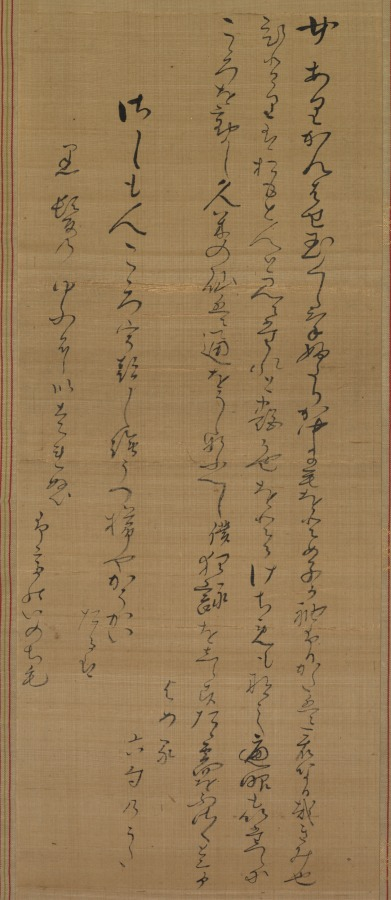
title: Two Beauties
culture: Japan, Edo period (1615–1868)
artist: Kitao Shigemasa (Japanese, 1739–1819)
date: late 1700s–early 1800s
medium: hanging scroll, pillar painting: ink and color on silk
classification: Painting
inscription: Artist's signature and seal, lower right corner. Poem inscribed on upper section of scroll.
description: Shigemasa favored using colors in broad opaque masses, as seen here in the beauties’ robes. He was a painter, printmaker, and poet, specializing in courtesan and actor prints. The format of this hanging scroll or "pillar painting" allows for the work to be hung on a pillar in a Japanese home.